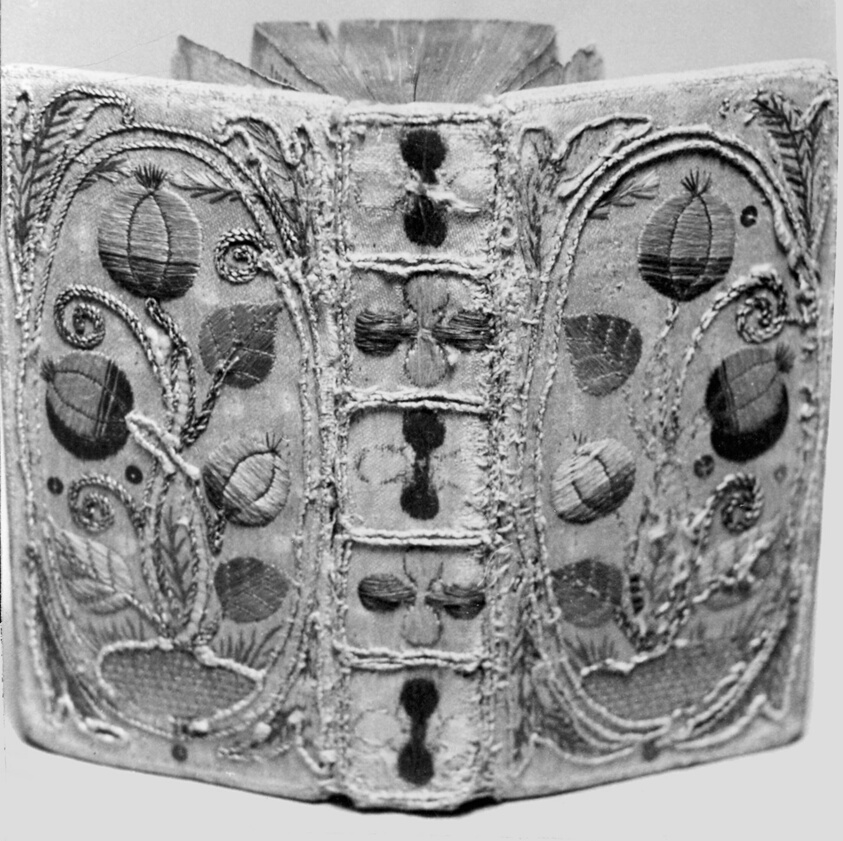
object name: Book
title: Book Cover for the Old Testament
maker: England, London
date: 1701/25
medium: Silk, satin weave; embroidered in satin, single satin, split and stem stitches; laid work and couching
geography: London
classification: textile; needlework (visual works); book; accessories (object genre)